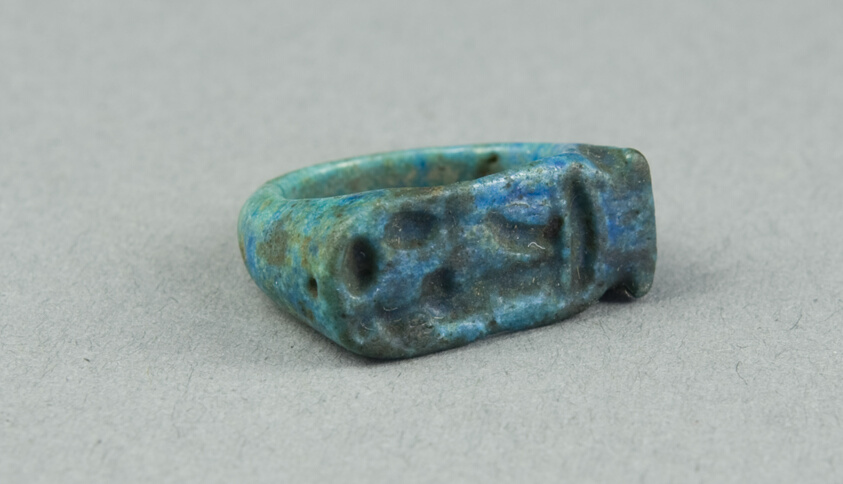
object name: Costume and Accessories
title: Ring: Nebmaatre (Amenhotep III)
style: eighteenth dynasty, new kingdom, egyptian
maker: Egyptian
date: New Kingdom, Dynasty 18, reign of Amenhotep III (about 1390–1352 BCE)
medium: Faience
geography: Egypt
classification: ceramics; jewelry; ancient art; costume; faïence (composite material)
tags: pharaohs